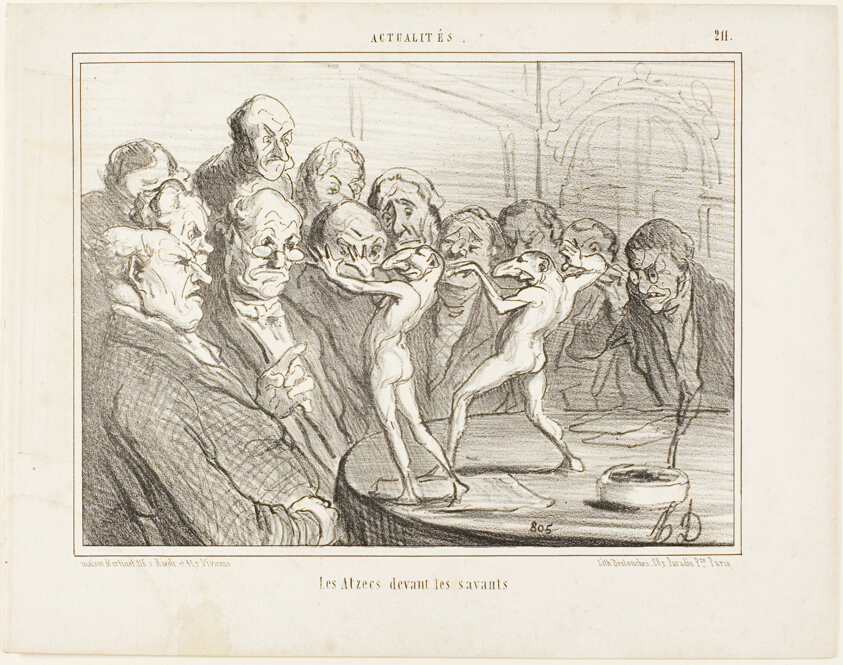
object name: Print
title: The Aztecs before the scientists, plate 211 from Actualités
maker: Honoré Victorin Daumier; French, 1808-1879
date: 1855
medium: Lithograph in black on white wove paper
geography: France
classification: lithograph; print; prints and drawing